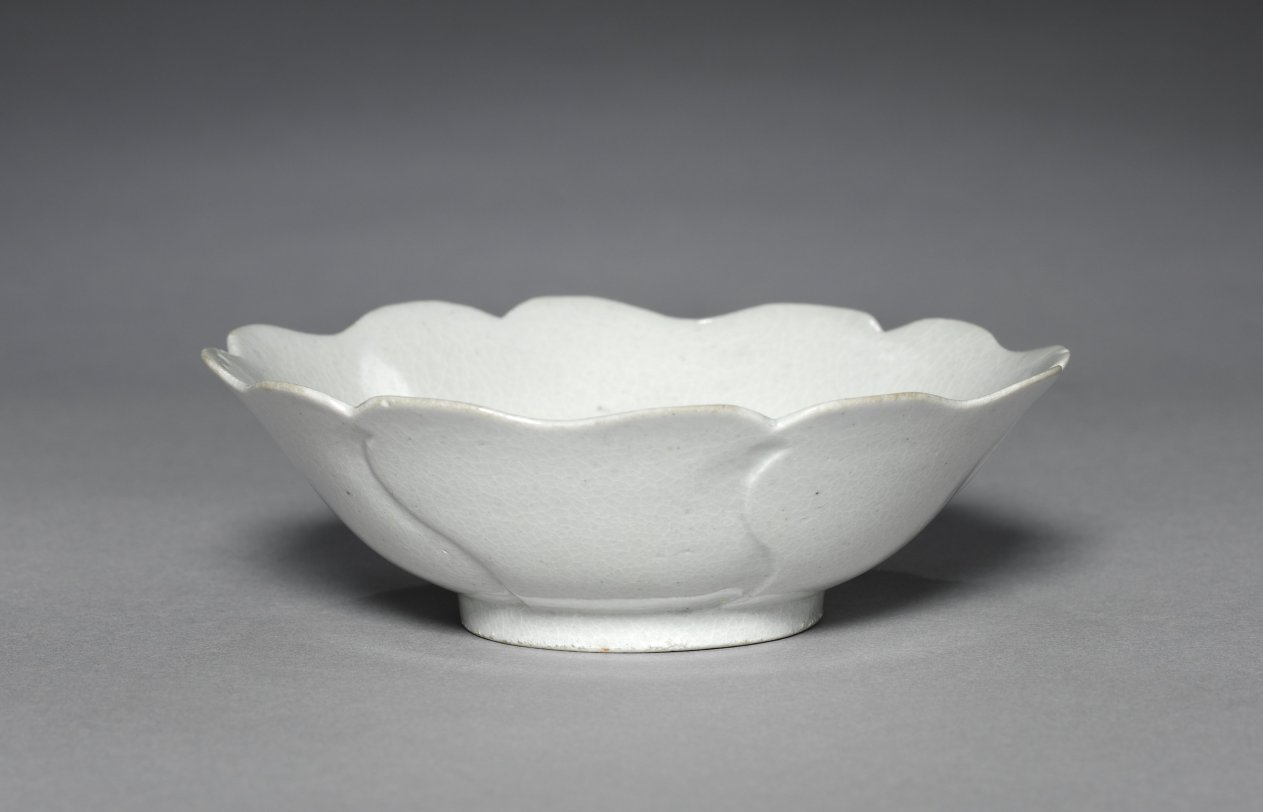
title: Hollyhock-shaped Cup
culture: Korea, Joseon dynasty (1392–1910)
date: 1400s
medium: porcelain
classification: Ceramic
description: This very rare porcelain cup is called a hollyhock cup because its rim resembles a hollyhock blossom. This type of cup was produced only in the state-owned kiln for a limited time from the late 1400s to mid-1500s. Like sunflowers, hollyhocks also open their blooms toward the sun, signifying loyalty to the king. According to Korean royal archives, hollyhock cups were used during state banquets when the king offered wine to court officials. Also, a hollyhock-shaped cup was used in tea ceremonies to welcome visiting Chinese diplomats. In comparison to ceramic works of the late Joseon period that favor natural and rustic sensibilities seen in this gallery, this hollyhock cup illustrates the precision and perfection that were core aesthetic values of early Joseon period art.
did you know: This cup shaped like a hollyhock flower was used in tea ceremonies to welcome visiting Chinese diplomats during the Joseon period (1392–1910).